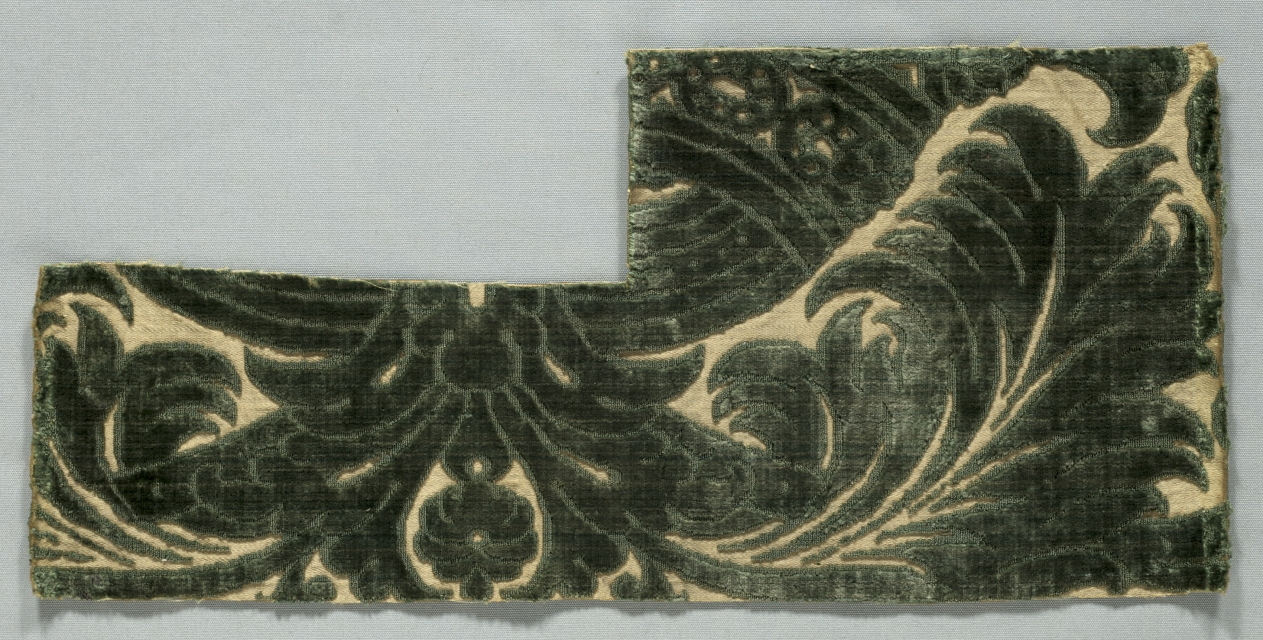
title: Velvet Fragment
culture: Italy, late 17th century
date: late 1600s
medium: velvet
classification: Velvet